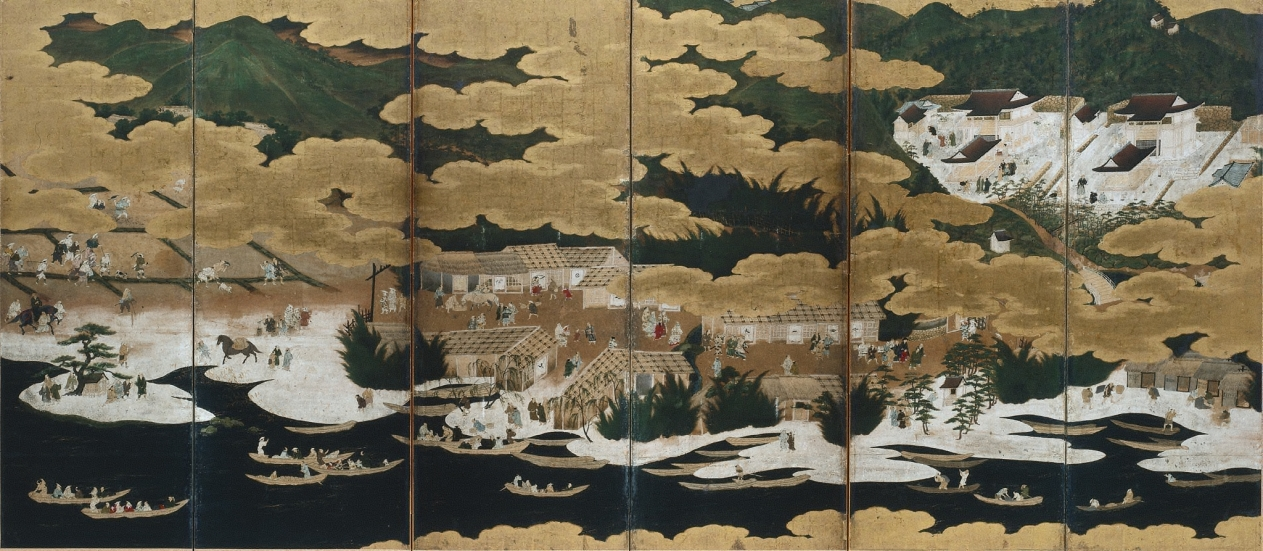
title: Famous Views of Ōmi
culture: Japan, Edo period (1615–1868)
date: 1660s–90s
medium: One of a pair of six-panel folding screens; ink, color, and gold on gilded paper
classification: Painting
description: Ōmi is an area around Lake Biwa near Kyoto. The Shinto shrine Hiyoshi Taisha and the Buddhist temple Ishiyamadera are in the upper right and upper left of the composition, respectively. At center is the pilgrimage route and people in the town before the temple gates. Harvested rice fields to the right and flowering cherry blossom trees at left show seasonal change from winter to spring.